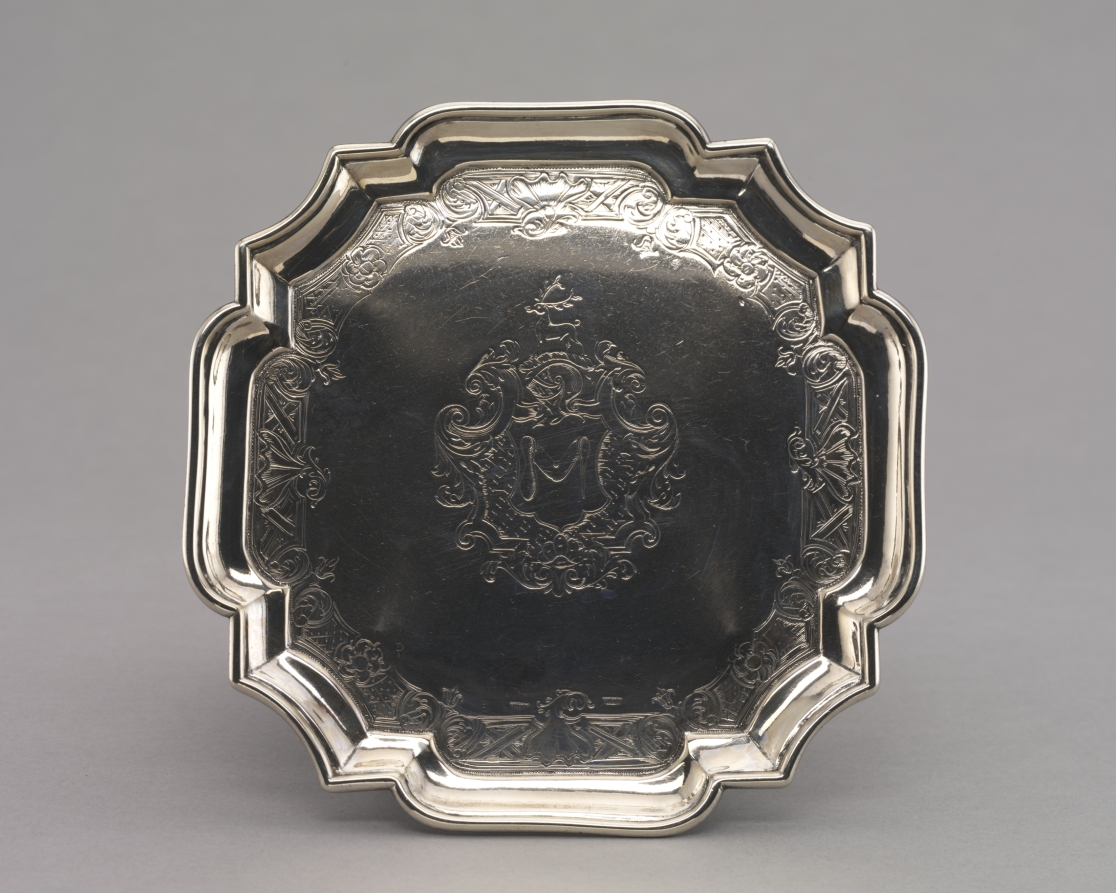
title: Salver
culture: America, Massachusetts, Boston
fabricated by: Jacob Hurd (American, 1702–1758)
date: 1740–50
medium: silver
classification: Silver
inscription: engraved: H over A + T over 1750 in shaded block letters underneath each salver.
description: The coat of arms is that of the Hastings family, the original owners of these serving pieces.